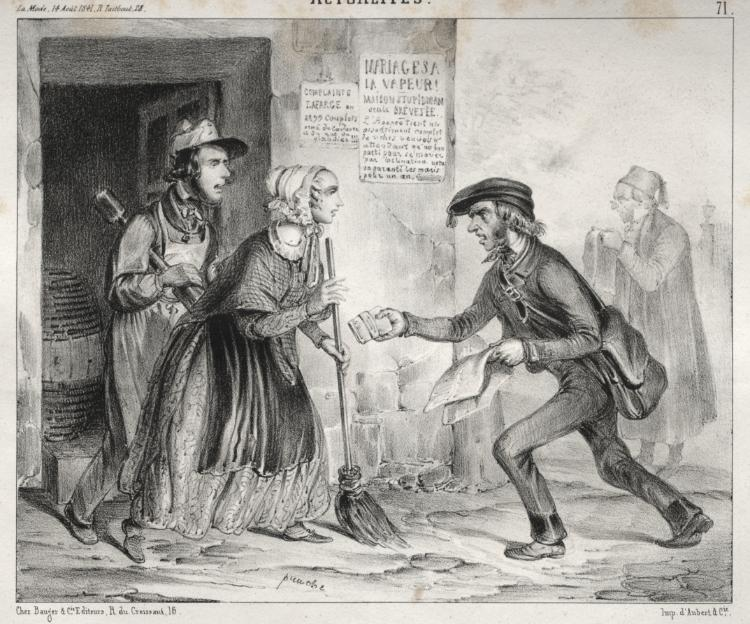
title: Actualités: Gare la Question d'Orient!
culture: France, 19th century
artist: Clémente Pruche (French, 1831–1870)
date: 1841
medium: lithograph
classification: Print